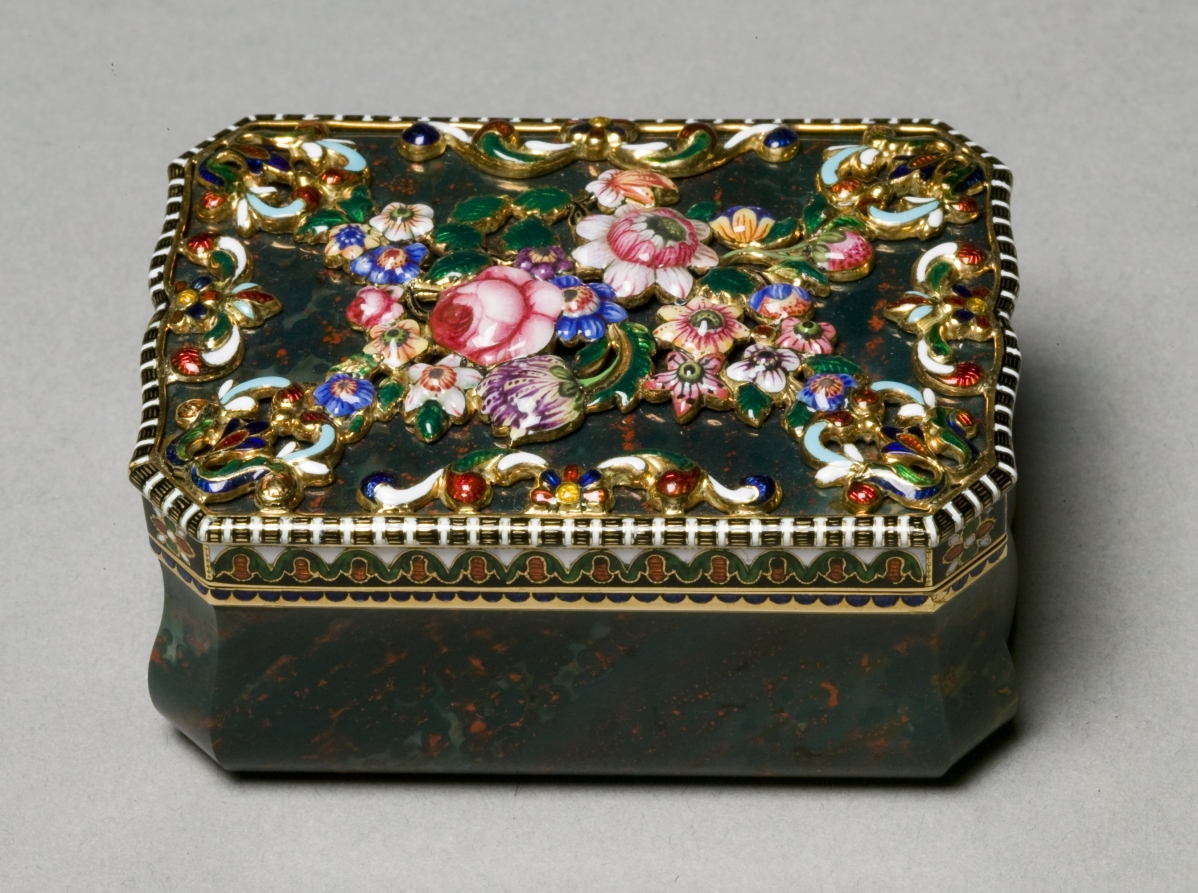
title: Snuff Box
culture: Switzerland, Geneva, early 19th century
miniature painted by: attributed to Jean-Louis Richter (Swiss, 1766–1841)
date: c. 1820–40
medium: gold, champlevé enamel, bloodstone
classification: Miscellaneous